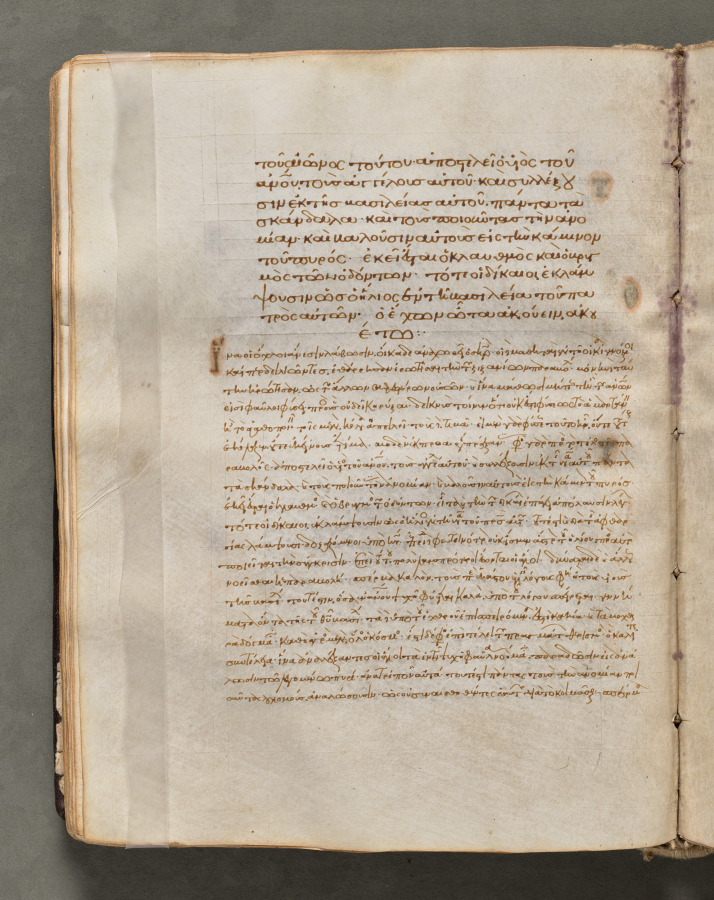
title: Text, folio 61 (verso), from a Gospel Book with Commentaries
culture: Byzantium, Constantinople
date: c. 1000–1100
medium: ink, tempera, and gold on vellum; leather binding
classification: Bound Volume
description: Each of the four gospels in this book opens on a page with brilliantly illuminated borders depicting the author of the text as well as birds-principally peacocks, symbols of the immortality of the soul-and fountains, representing the fountain of life and the salvation of the soul. This volume consists of 428 leaves with texts in Greek. Its level of sophistication suggests that it was probably written and decorated in a monastery in Constantinople.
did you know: Gospel Books were carried in procession through Byzantine churches.